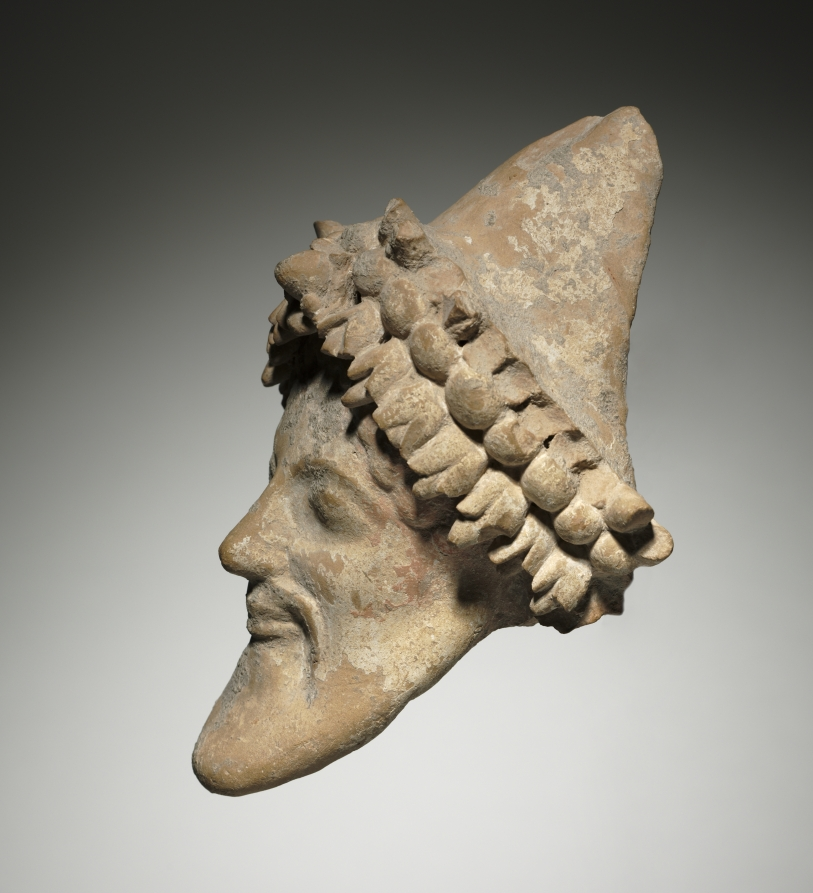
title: Head of Bearded Banqueter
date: 525–500 BCE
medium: terracotta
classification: Sculpture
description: This terracotta head of a man features wide, almond-shaped eyes and a serene smile beneath a long mustache. The man has a long beard and wears a wreath with leaves protruding above and below a string of fruit or beads. His head is covered by a pointed cap. This fragment probably belonged to a figure of a banqueter, or perhaps even Dionysos, the god of wine.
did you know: Wreaths were often worn during Greek symposia (banquets).